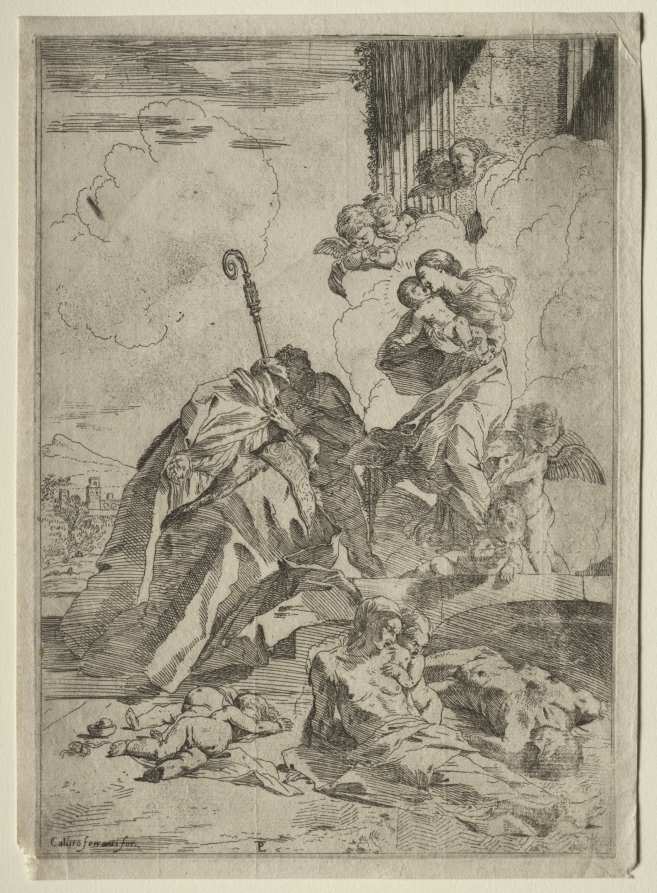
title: Three Lucchese Saints interceding with the Virgin for the Victims of the plague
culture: Italy, 17th century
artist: Pietro Testa (Italian, 1612–1650)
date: ca. 1630–31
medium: etching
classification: Print